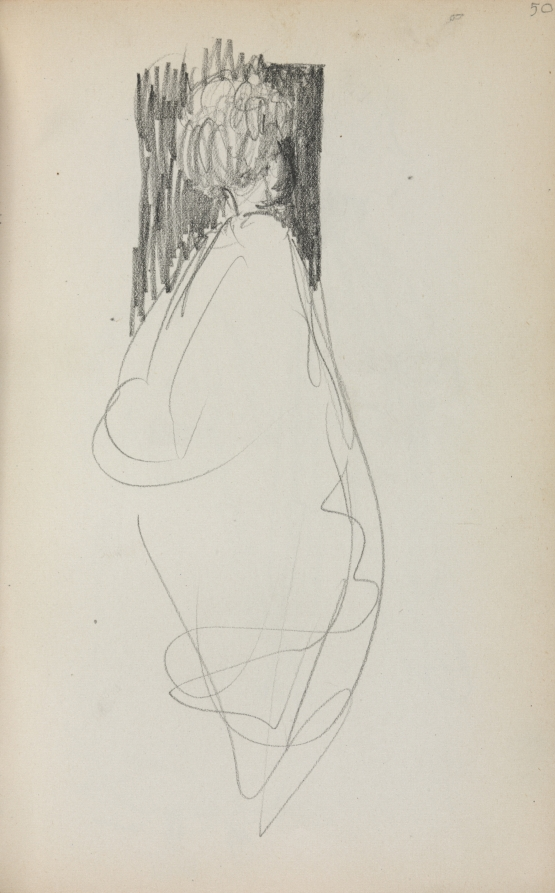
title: Italian Sketchbook: Standing Woman (page 50)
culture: America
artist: Maurice Prendergast (American, born Newfoundland [now Canada], 1858–1924)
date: 1898–1899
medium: pencil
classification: Bound Volume